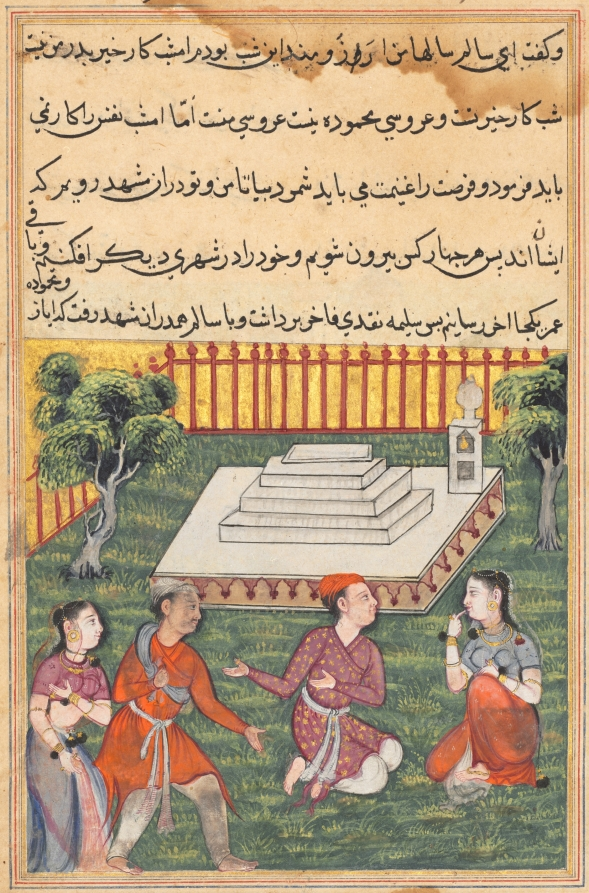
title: The two couples reach a foreign city where they make their home, from a Tuti-nama (Tales of a Parrot): Thirty-third Night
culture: Mughal India, court of Akbar (reigned 1556–1605)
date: c. 1560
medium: gum tempera, ink, and gold on paper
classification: Painting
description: Childhood sweethearts Ayaz and Mahmuda sit together on the grass in the sanctuary, having recently been reunited after Mahmuda’s unwilling marriage to another man. Salim, Ayaz’s friend, enters from the left with his lover Salima. Together, the four decide to escape to a foreign city where they can live the rest of their lives in peace.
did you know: The structure in the background, called a cenotaph, marks the tomb of a Sufi holy man.